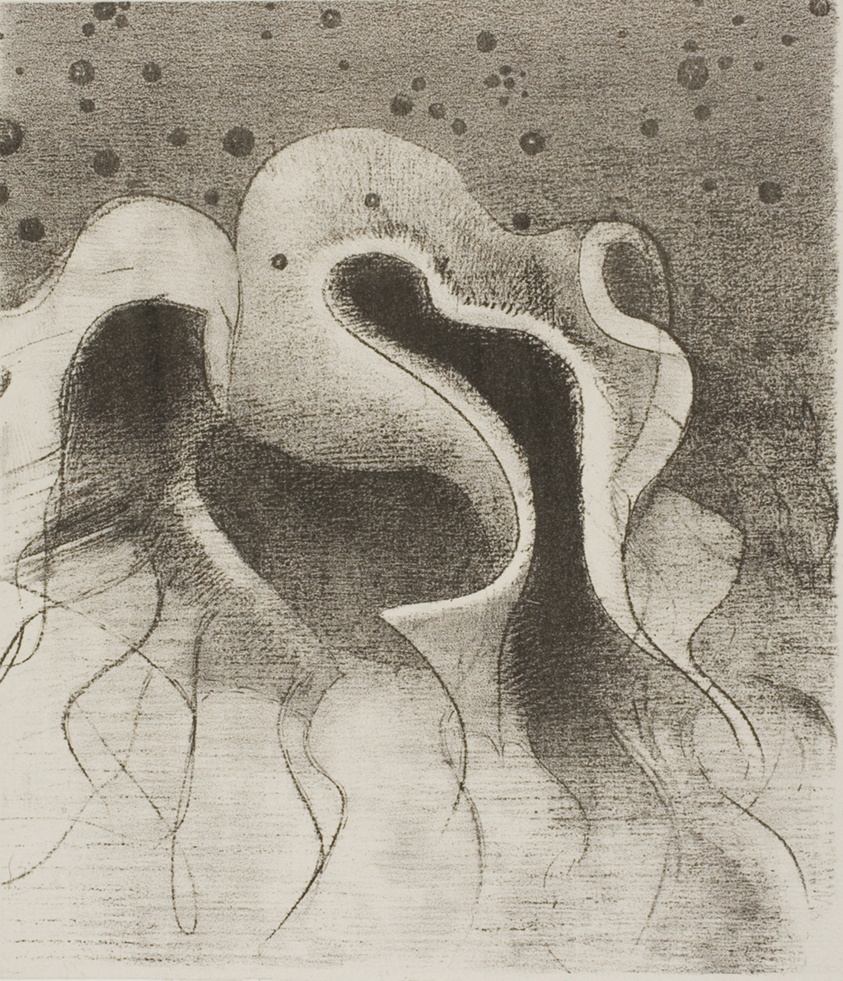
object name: Print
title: The Beasts of the Sea, Round Like Leather Bottles, plate 22 of 24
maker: Odilon Redon (French, 1840-1916)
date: 1896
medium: Lithograph in black on light gray China paper laid down on ivory wove paper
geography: France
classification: lithograph; print; prints and drawing; paper